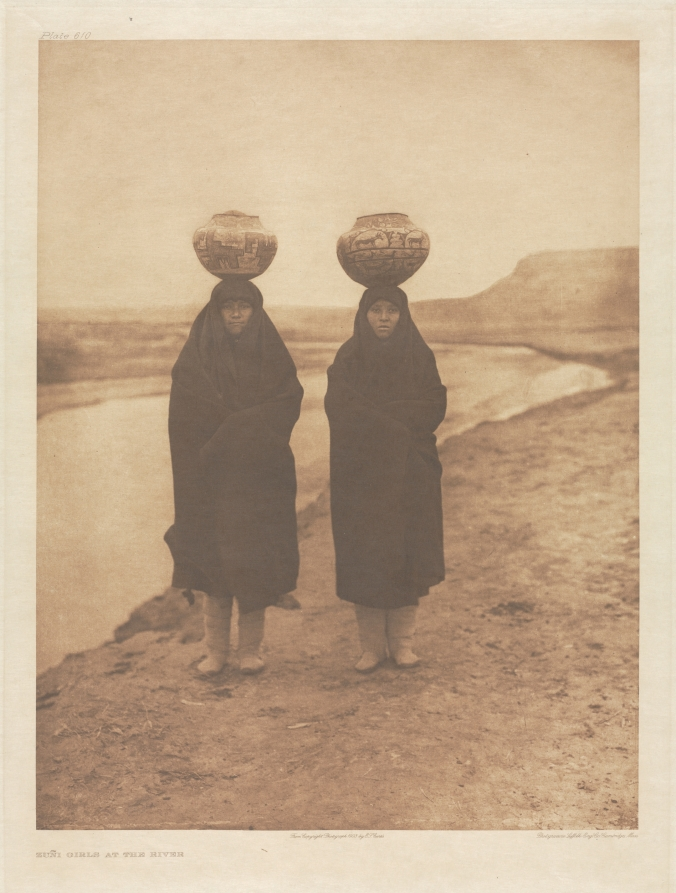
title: Portfolio XVII, Plate 610: Zuñi Girls at the River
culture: America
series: The North American Indian: being a series of Portfolios picturing and describing the Indians of the United States, the Dominion of Canada, and Alaska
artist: Edward S. Curtis (American, 1868–1952)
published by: The University Press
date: 1903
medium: photogravure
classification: Portfolio